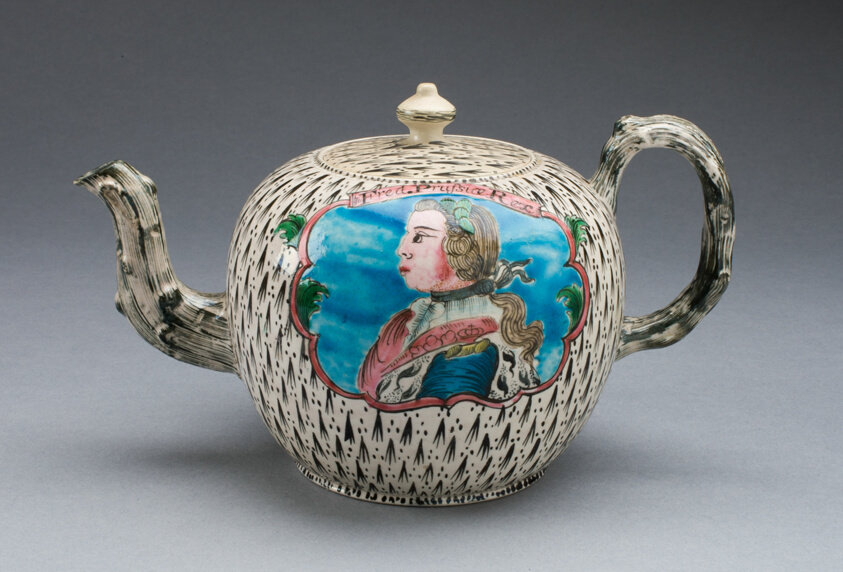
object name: Ceramics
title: Teapot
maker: Staffordshire, England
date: c. 1760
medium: Salt-glazed stoneware, polychrome enamels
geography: Staffordshire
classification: teapot; stoneware; pottery; european decorative arts; salt-glazed stoneware; ceramics